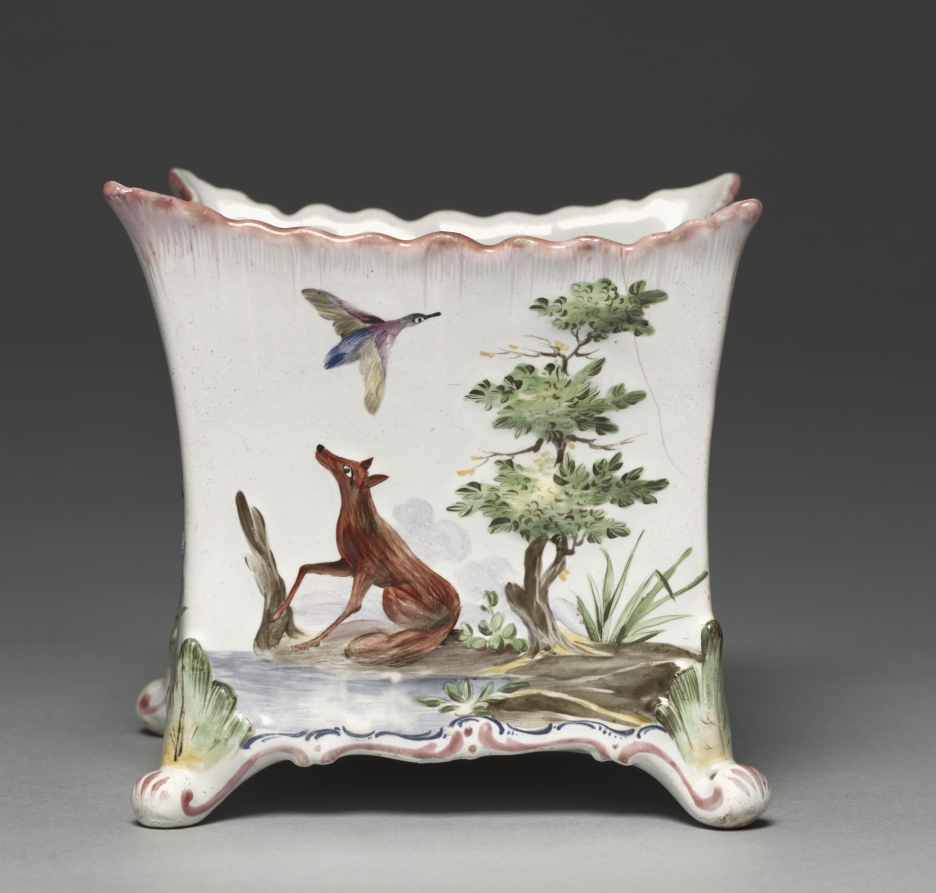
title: Flower Container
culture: France, 18th century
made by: Sceaux Factory (French, active 1748–66)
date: c. 1765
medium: faience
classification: Ceramic